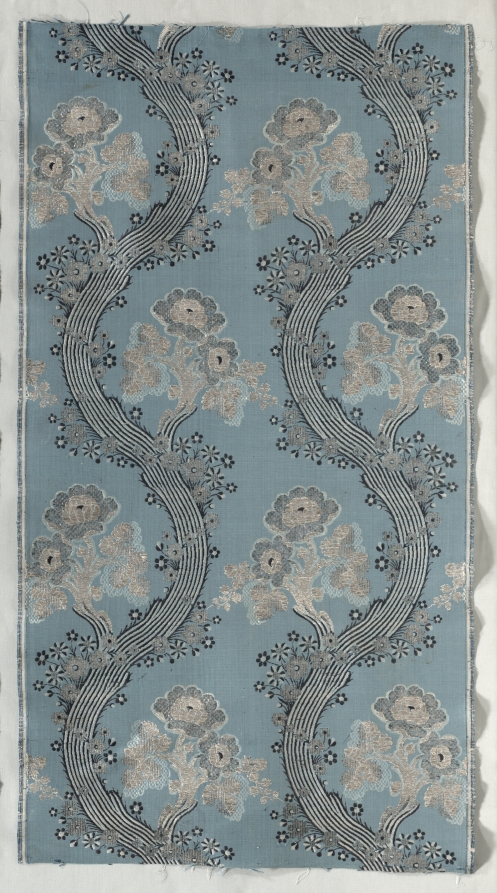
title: Length of Textile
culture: France, 18th century, Period of Louis XV (1723-1774)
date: 1723–1774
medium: brocade; silk and metal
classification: Textile